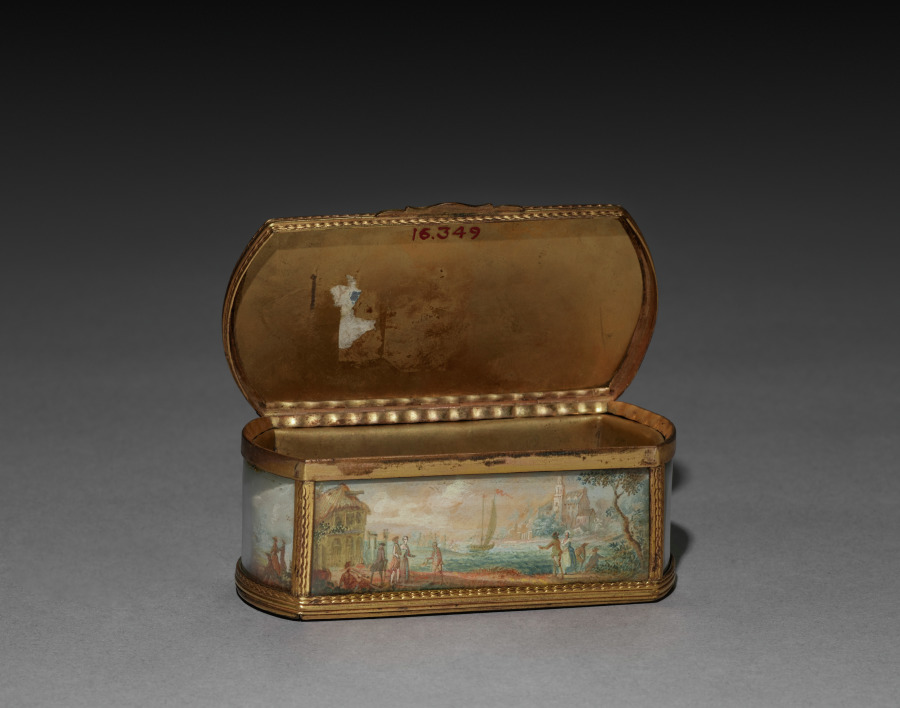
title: Snuff Box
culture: France, 19th century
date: 1800s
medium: gilt metal box with painted miniatures under glass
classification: Miscellaneous